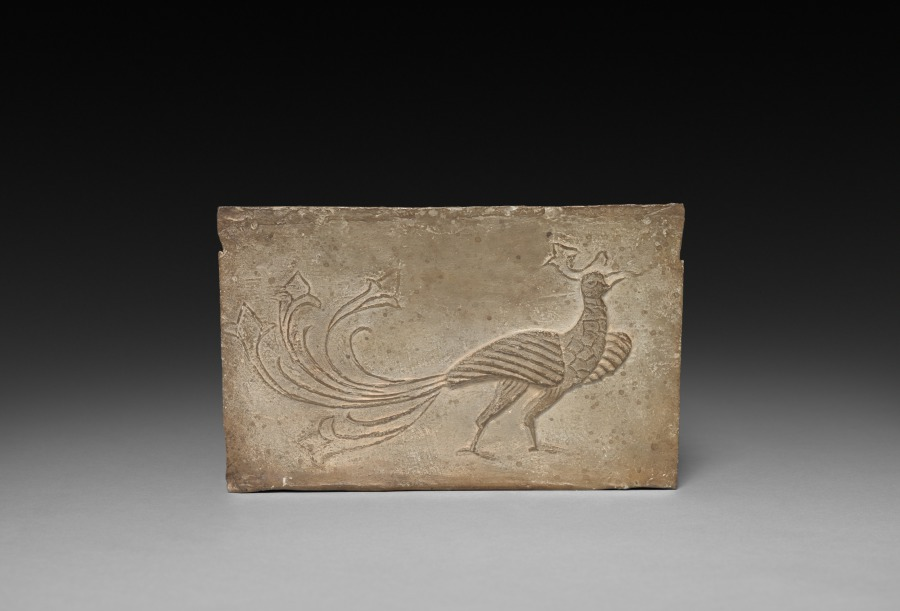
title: Panel from Model Cooking Stove: Vermilion Bird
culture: China, from a tomb in Xi'an, Shaanxi province, Western Han dynasty (206 BCE–8 CE)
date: 100–1 BCE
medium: earthenware with impressed relief decoration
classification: Ceramic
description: Han dynasty tombs were often furnished with grave goods to provide the deceased with items for the afterlife. Four earthenware panels were made in molds and then joined together to make a miniature model of a stove, which was placed in a burial chamber. The stove's four sides show the animals of the cardinal directions. The vermilion phoenix-bird faces south.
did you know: Han dynasty tombs were often furnished with grave goods to provide the deceased with items for the afterlife.